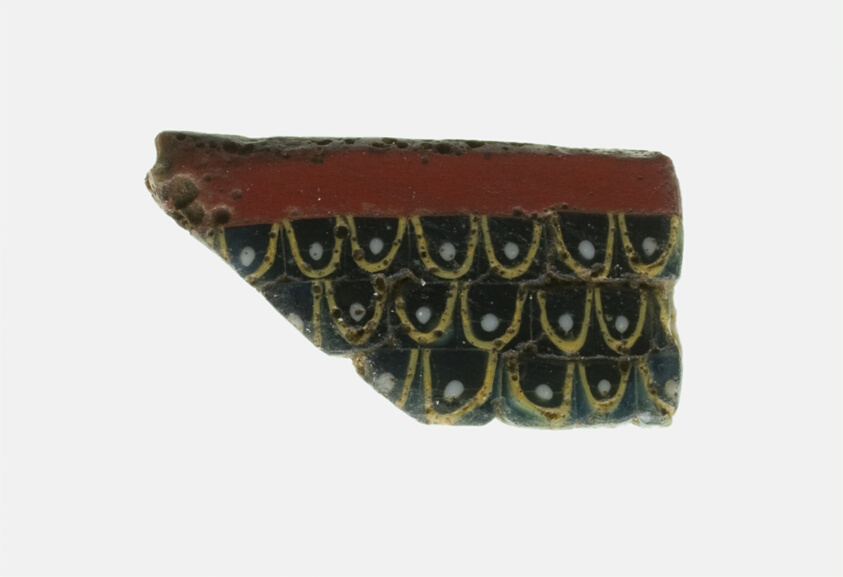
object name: Decorative Arts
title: Fragment of an Inlay Depicting a Feather Pattern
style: roman (ancient, style or period), ancient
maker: Roman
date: 1st century BCE–1st century CE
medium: Glass, mosaic glass technique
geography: Italy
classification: glass; inlay; ancient art; decorative arts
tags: decoration, feathers